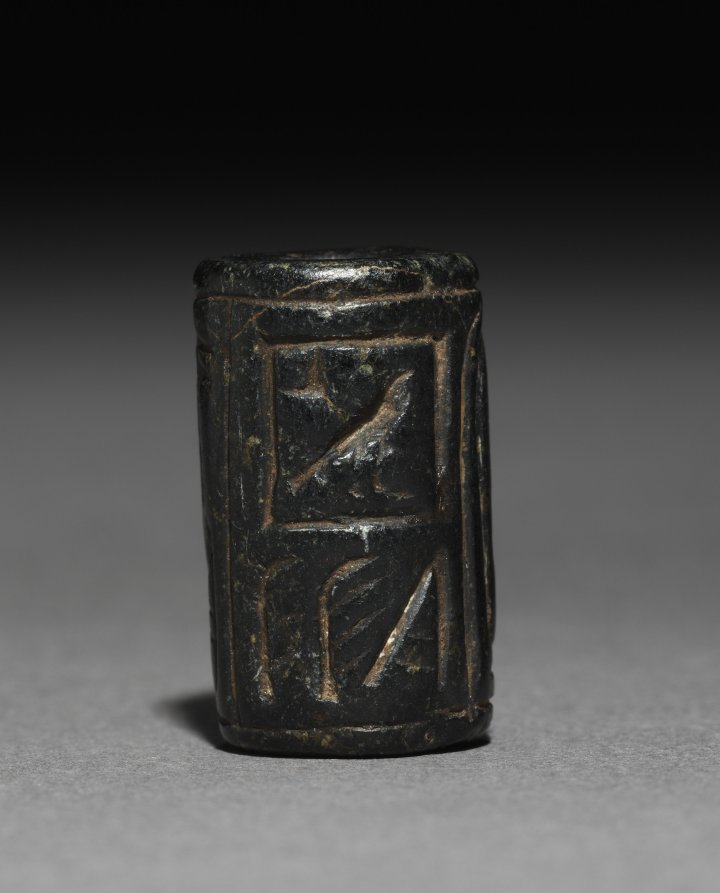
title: Cylinder Seal of Mycerinus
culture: Egypt, Old Kingdom (2647–2124 BCE), Dynasty 4, reign of Menkaure (2532–2503 BCE)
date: 2573–2124 BCE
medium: serpentinite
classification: Scarabs